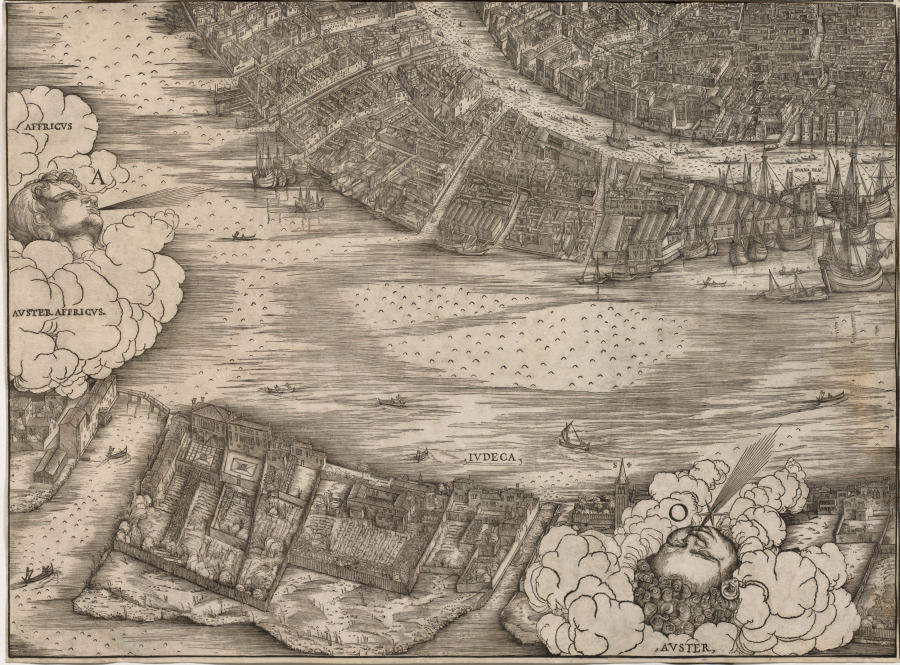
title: View of Venice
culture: Italy, early 16th Century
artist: Jacopo de' Barbari (Italian, c. 1460/70–c. 1516)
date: 1500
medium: woodcut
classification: Print